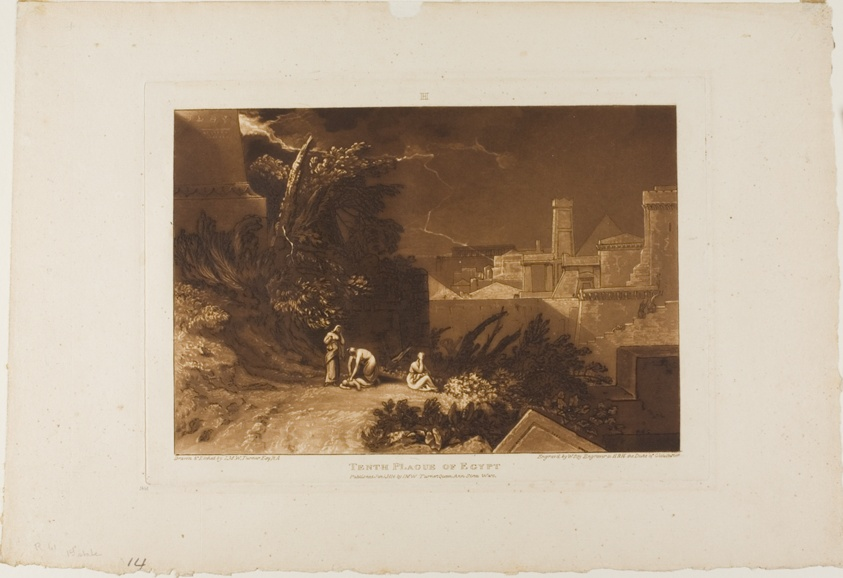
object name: Print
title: Tenth Plague of Egypt, plate 61 from Liber Studiorum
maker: Joseph Mallord William Turner (English, 1775-1851); Engraved by William Say (1768-1834)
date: published January 1, 1816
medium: Etching and engraving in brown on cream paper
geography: England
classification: etching; print; prints and drawing